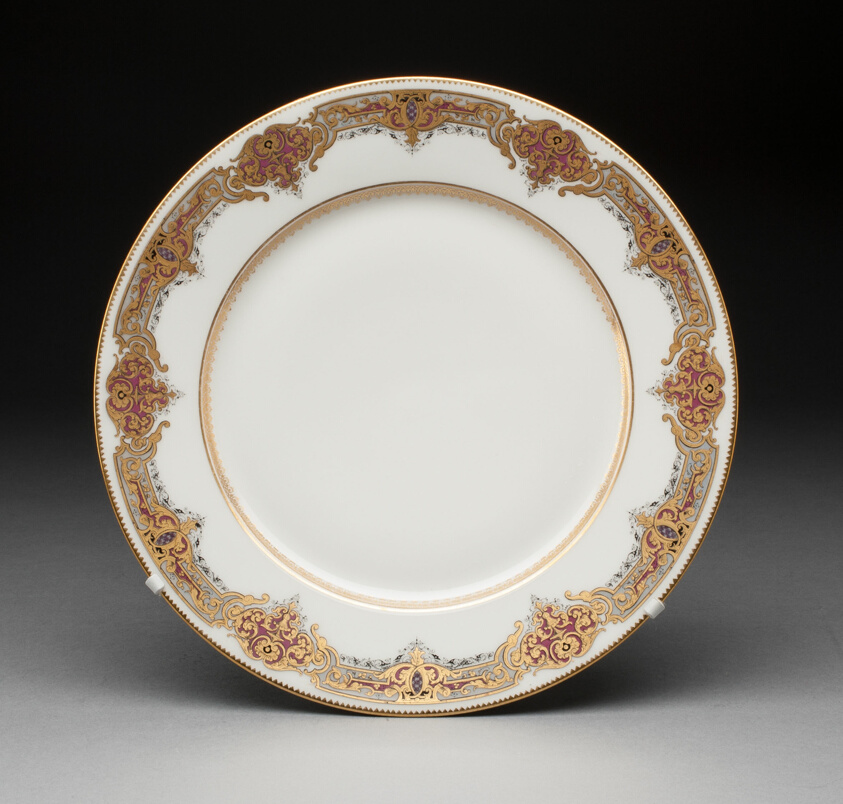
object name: Ceramics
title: Plate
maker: Sèvres Porcelain Manufactory; French, founded 1740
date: 1846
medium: Hard-paste porcelain with polychrome enamels and gilded decoration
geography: Sèvres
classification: plate (general, dish); tableware; dish (vessel); ceramics; porcelain; european decorative arts